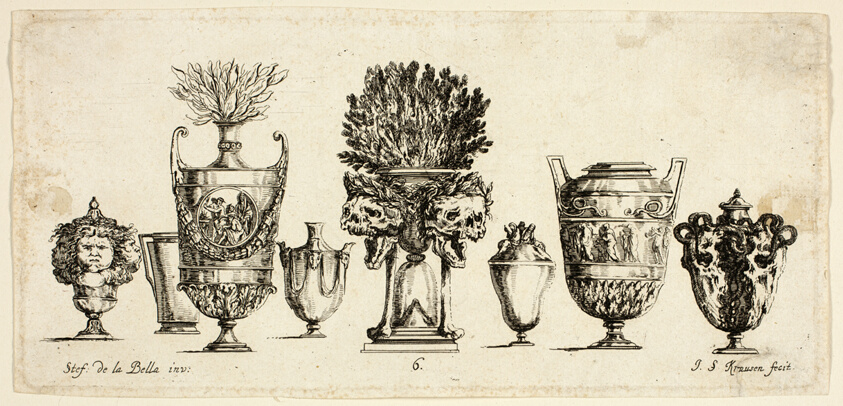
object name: Print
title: Plate Six from Raccolta di Vasi diversi di Stef. de la Bella Fiorentino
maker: Johanna Sibylla Küsel (German, active late 17th-early 18th century); after Stefano della Bella (Italian, 1610-1664)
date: 1646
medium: Etching on paper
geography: Germany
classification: etching; print; prints and drawing